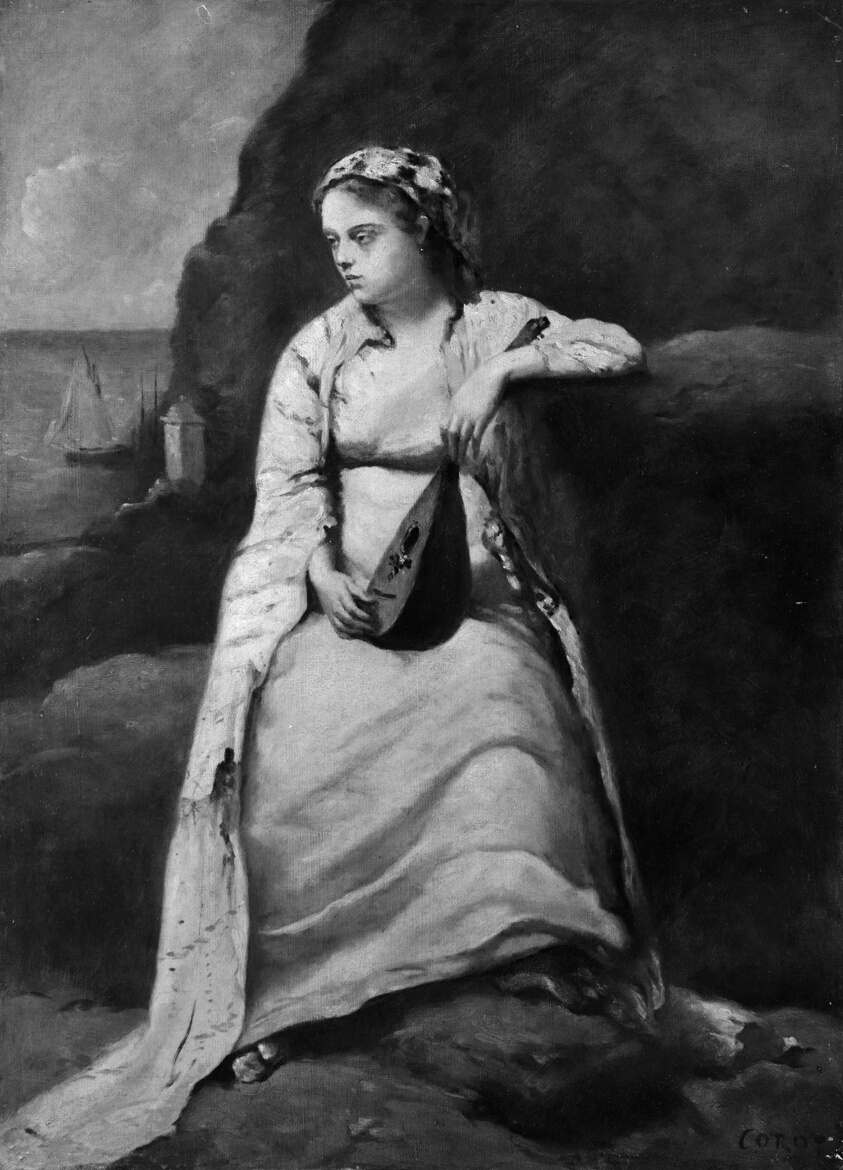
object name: Painting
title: Haydée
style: 19th century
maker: Imitator of Jean-Baptiste-Camille Corot (French, 1796–1875)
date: 19th century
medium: Oil on canvas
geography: France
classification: oil on canvas; paint; oil paintings (visual works); french; painting; european painting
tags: woman, fiction, French, Greece, Greek, ocean, rocks, water, youth